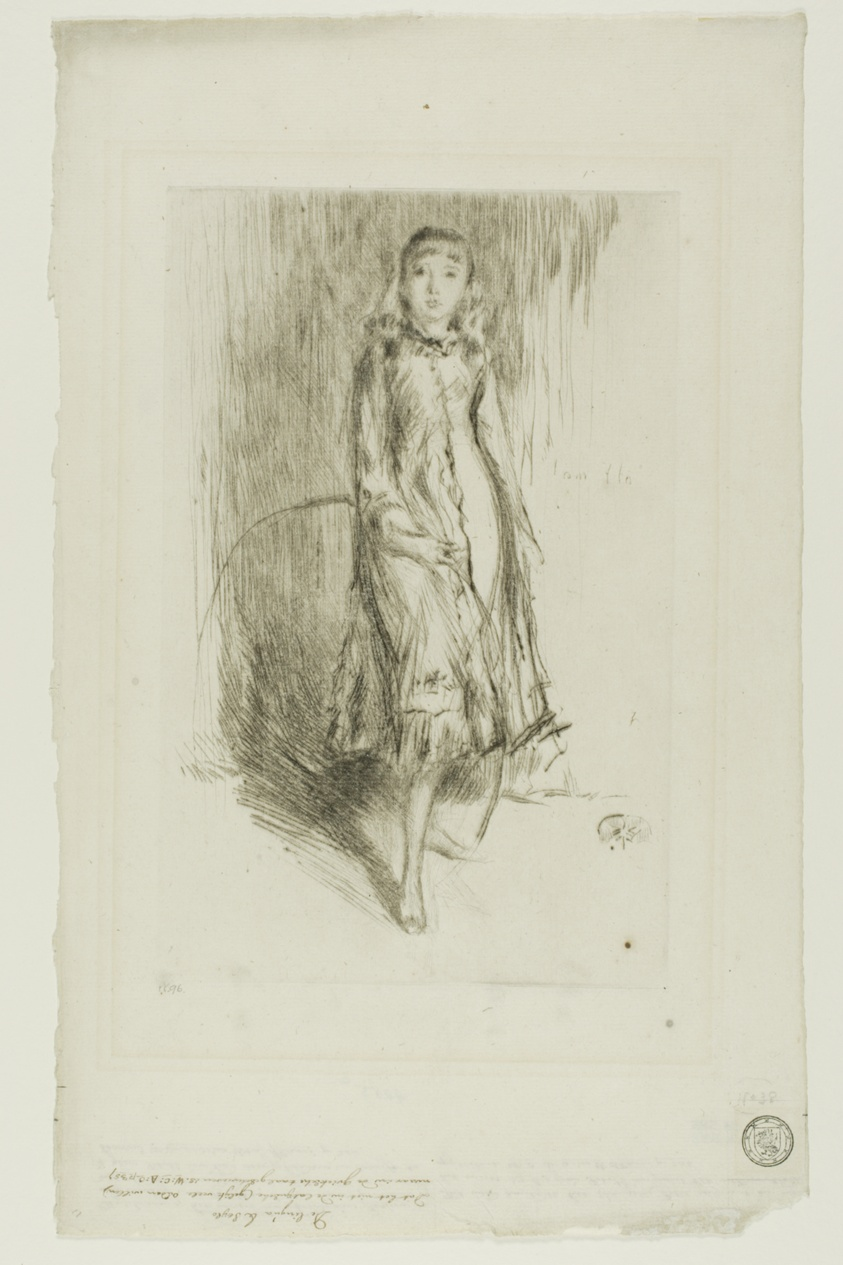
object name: Print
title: Florence Leyland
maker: James McNeill Whistler (American, 1834-1903)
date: 1874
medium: Drypoint in dark brown ink on ivory laid paper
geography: United States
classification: drypoint; print; prints and drawing; paper